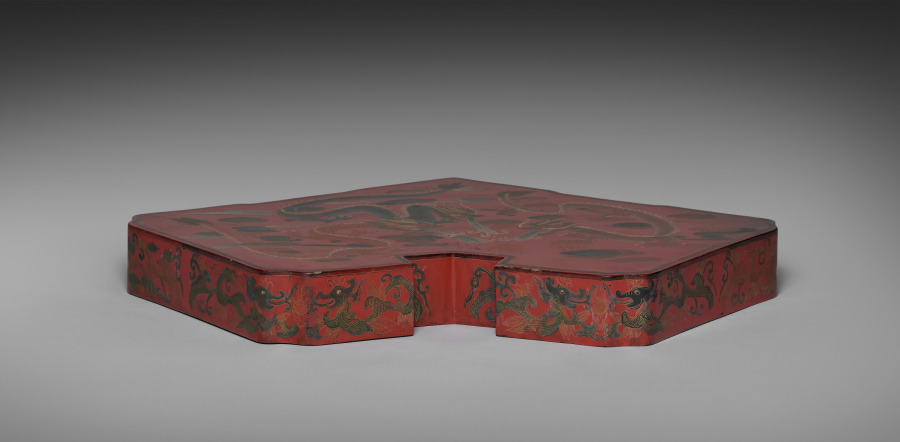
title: Lid for a Tiered Food Box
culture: Japan, Edo period (1615–1868)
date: late 1700s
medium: red lacquer over a wood core, with litharge painting and engraved gold designs (Ryukyuan)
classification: Lacquer